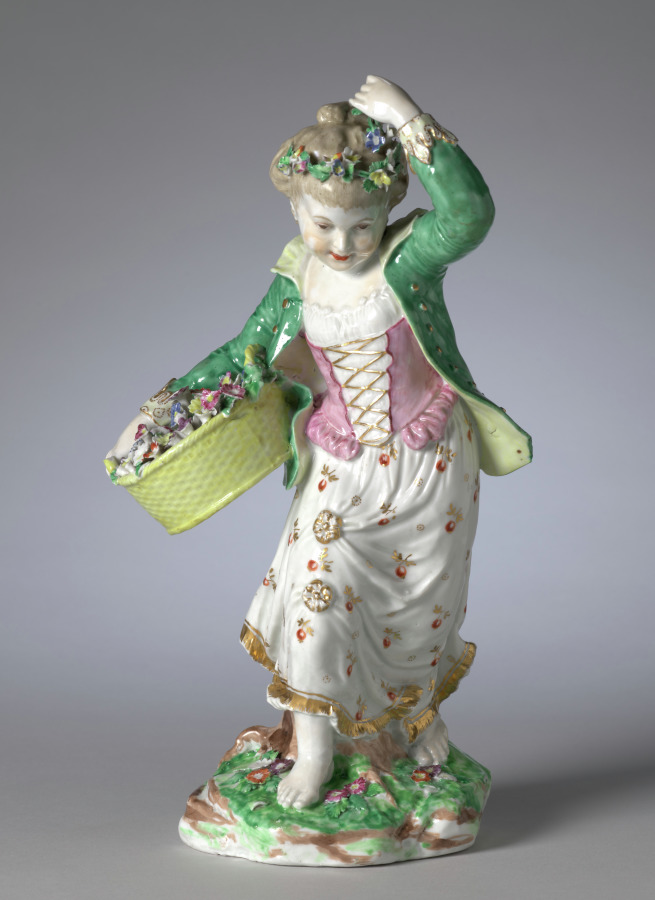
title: Figure of Spring from the Four Seasons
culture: England, Bristol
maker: Bristol Porcelain Factory (British, 1770–81)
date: c. 1775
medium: hard-paste porcelain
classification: Ceramic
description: The modern notion of childhood as a time of innocence and simplicity emerged during the second half of the eighteenth century. This understanding of adolescence led to numerous depictions of children as personifications of the four seasons. Here spring is portrayed as a young girl adorning her hair with flowers. The flowers filling her basket and growing in the grass around her signal spring’s arrival.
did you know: Allegorical figures most often decorated a table during the dessert course, providing amusing subjects for conversation.